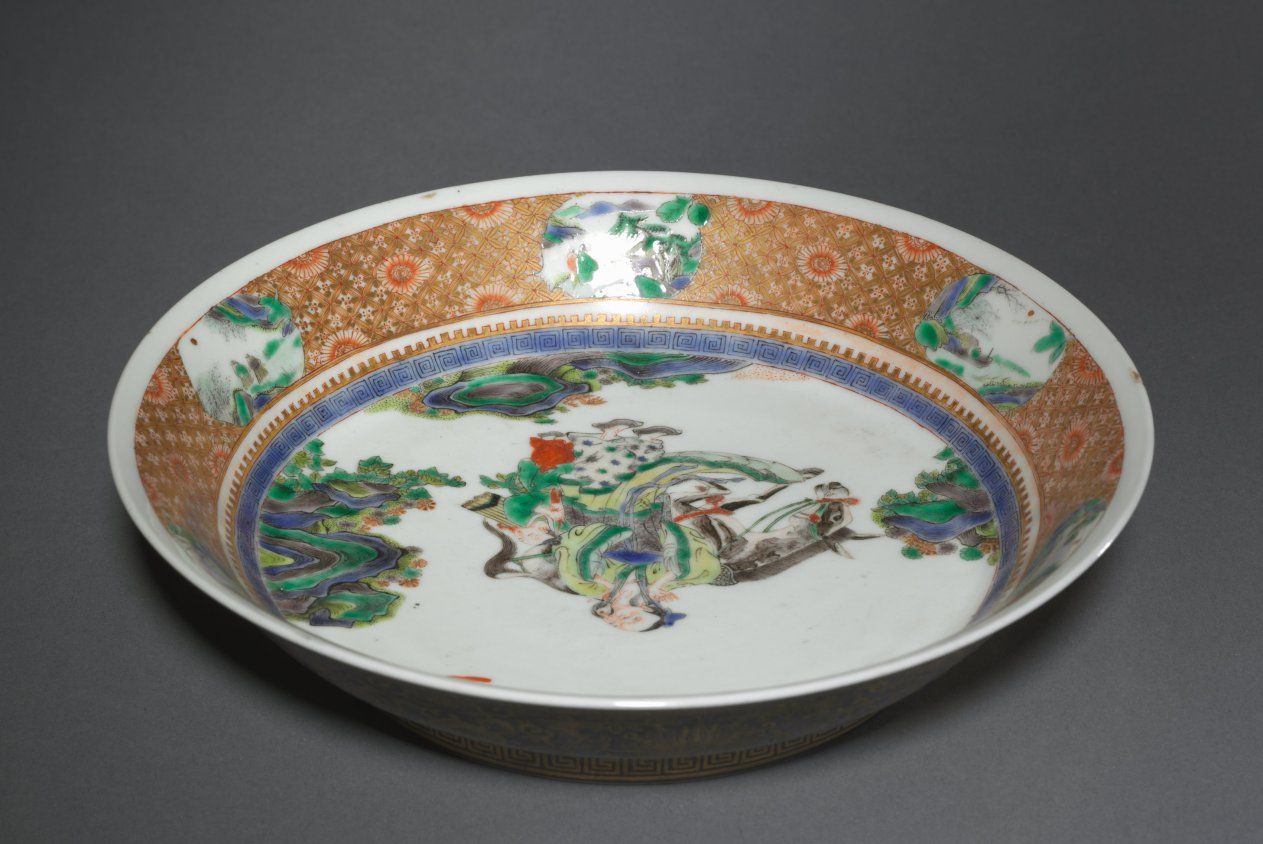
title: Dish with Zhang Guolao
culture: China, Jiangxi province, Jingdezhen kilns, Qing dynasty (1644-1911), Kangxi reign (1662-1722)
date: 1662–1722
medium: porcelain with famille verte overglaze enamel and painted gold decoration (interior) and powder blue glaze with painted decoration (exterior)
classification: Ceramic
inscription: 大清康熙年製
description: Zhang Guolao, featured on this dish, is one of the Eight Immortals and a gifted magician who was believed to know the secret arts to obtain longevity. Typically depicted as an old man and accompanied by his mule, he is the patron saint of artists. His mule is said to be magical; it can be folded up like a piece of paper to fit into a small bag. The central scene is framed by a sumptuously gold-decorated rim showing spaces reserved for landscape scenes in primarily fresh blue and green colors.